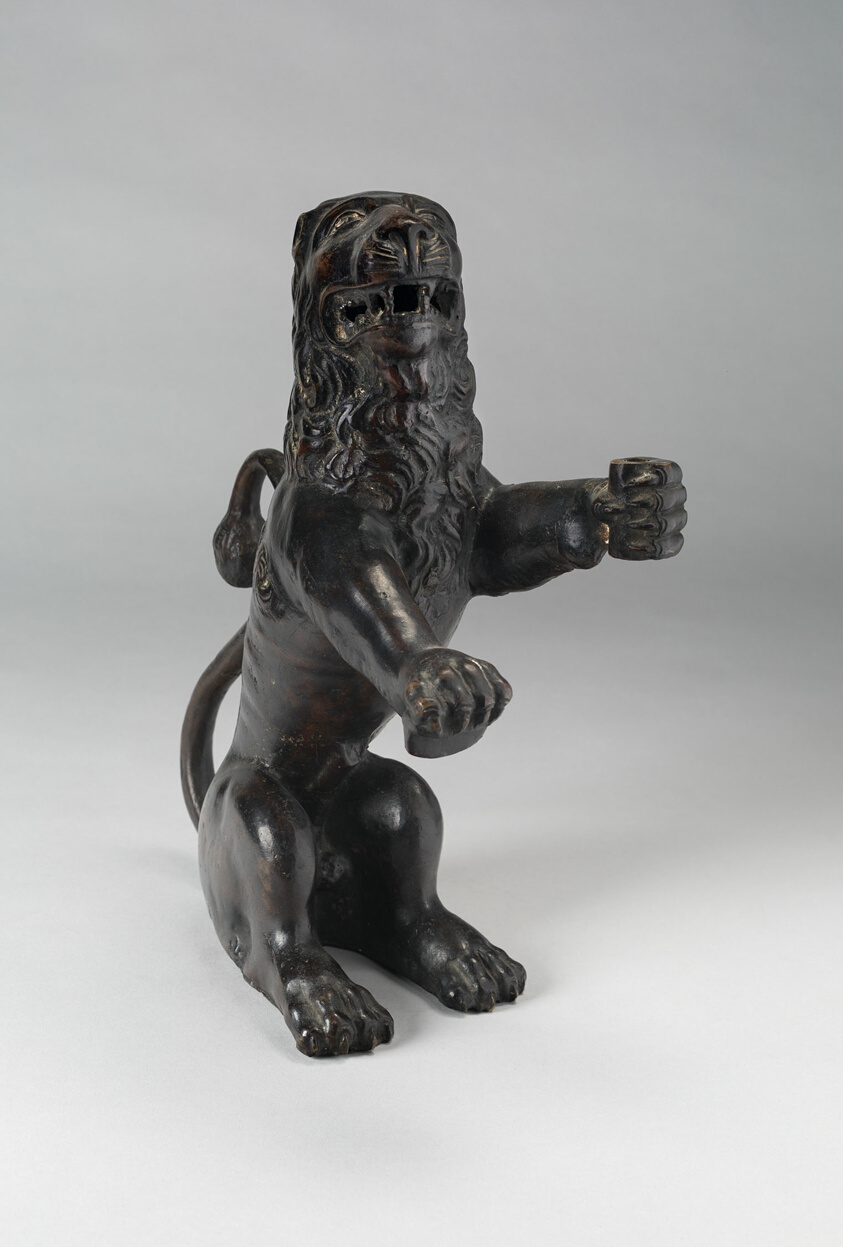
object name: Sculpture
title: Heraldic Lion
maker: Italian, Venice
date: c. 1450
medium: Bronze, black-brown patina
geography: Italy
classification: statuette; sculpture